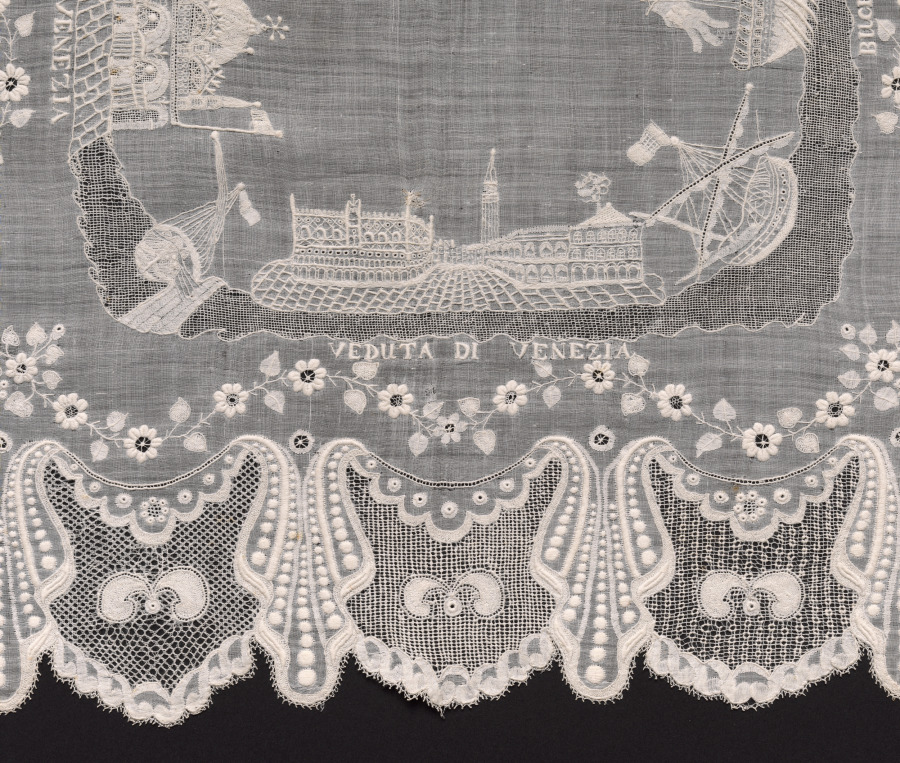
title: Handkerchief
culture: Italy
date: 1800s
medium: Plain weave linen with needle lace (drawnwork) and embroidery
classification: Embroidery